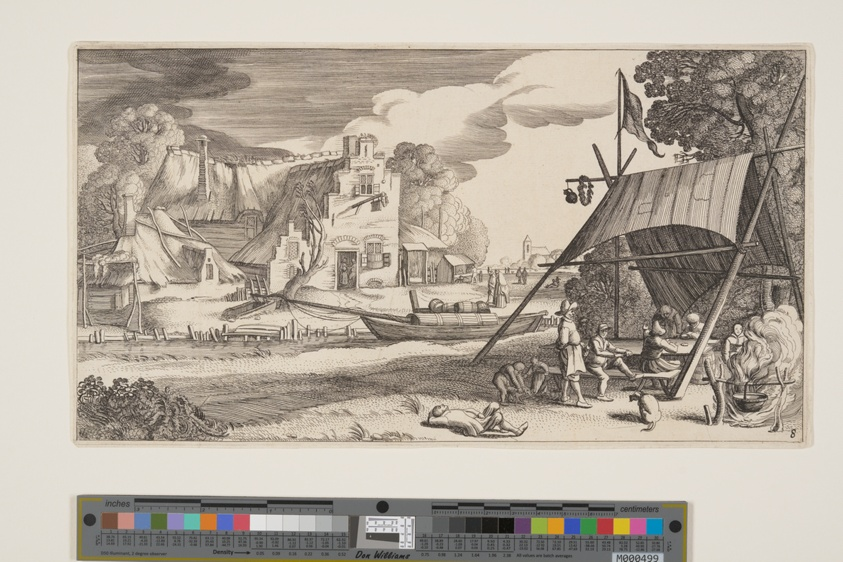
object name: Print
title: Tent with Country People, from Landscapes (Playsante Lantschappen)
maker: Attributed to Claes Jansz. Visscher II (Dutch, 1586-1652); after Jan van de Velde II (Dutch, c. 1593-1641)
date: c. 1641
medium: Etching, with engraving, on ivory laid paper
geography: Netherlands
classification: etching; paper; print; prints and drawing